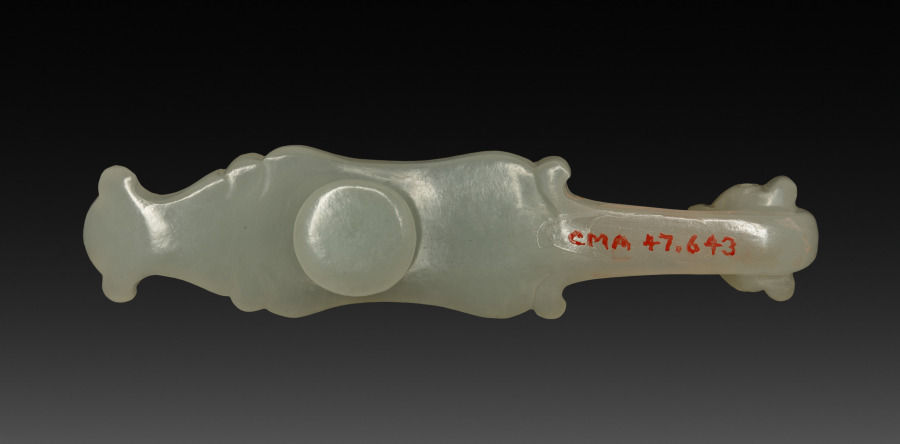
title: Buckle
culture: China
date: 1900s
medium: Jade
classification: Jewelry